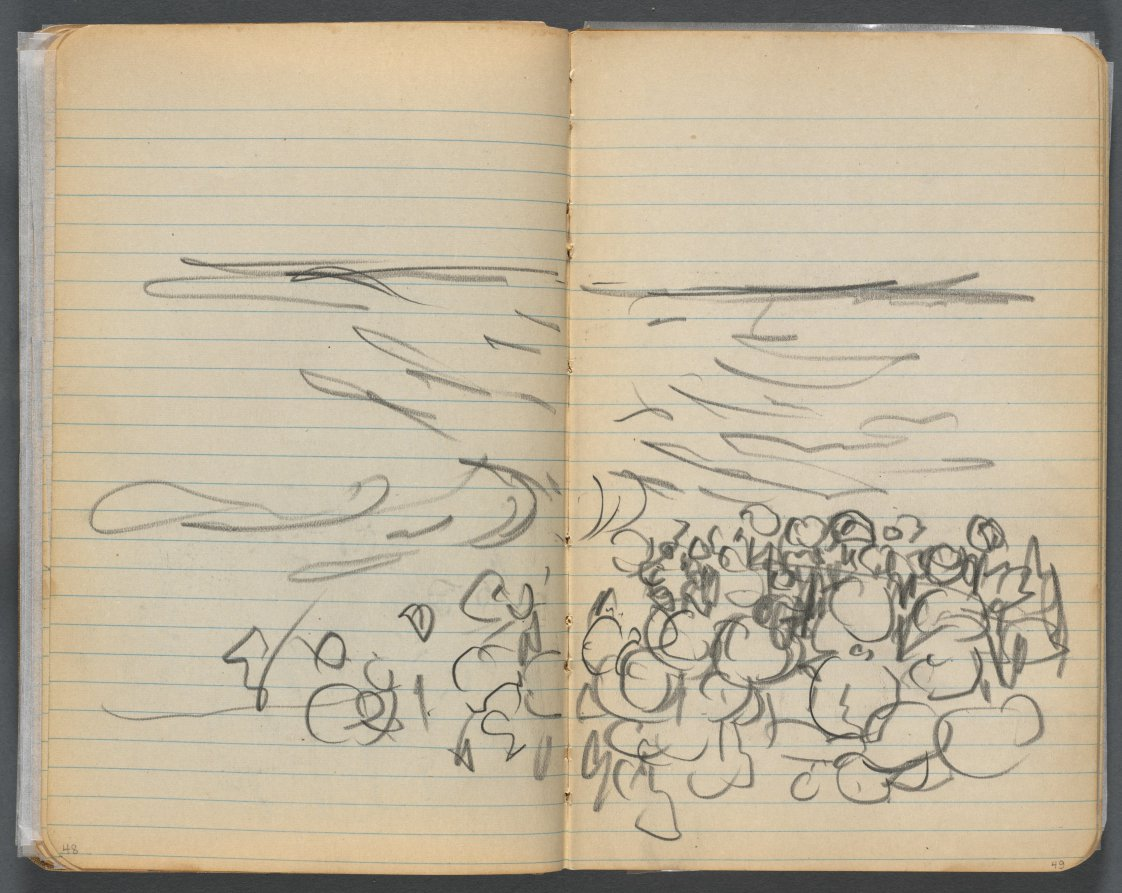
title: Sketchbook, page 048 & 49: Beach View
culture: America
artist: Maurice Prendergast (American, born Newfoundland [now Canada], 1858–1924)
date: 1905–10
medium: graphite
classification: Bound Volume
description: This sketchbook contains 69 pages of drawings, a diary largely devoted to the state of the artist's health, and a three-page discourse on the nature of genius and ideas.